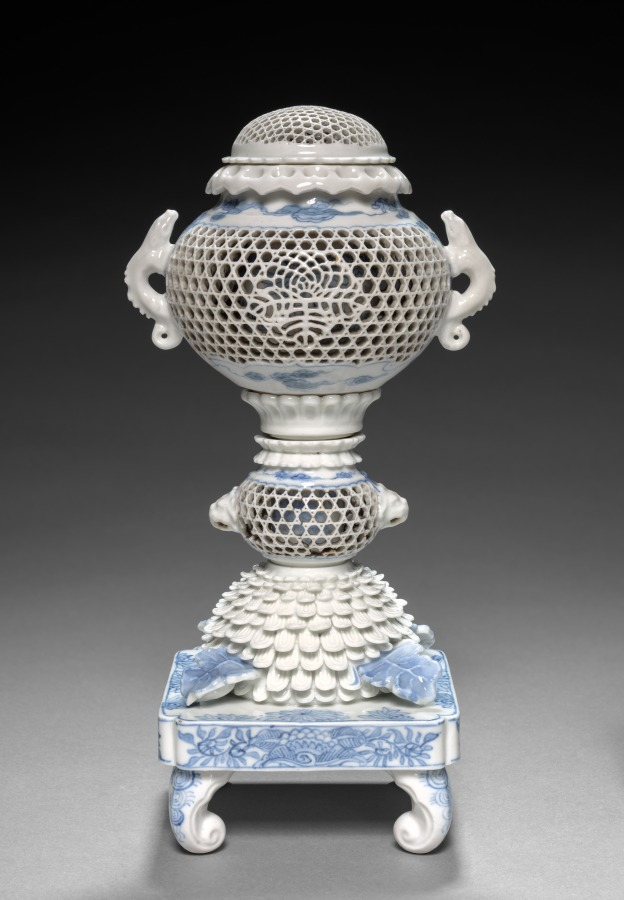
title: Chrysanthemum Censer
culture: Japan, Edo period (1615–1868)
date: 1700s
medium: Porcelain with underglaze blue (Hirado ware)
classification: Ceramic